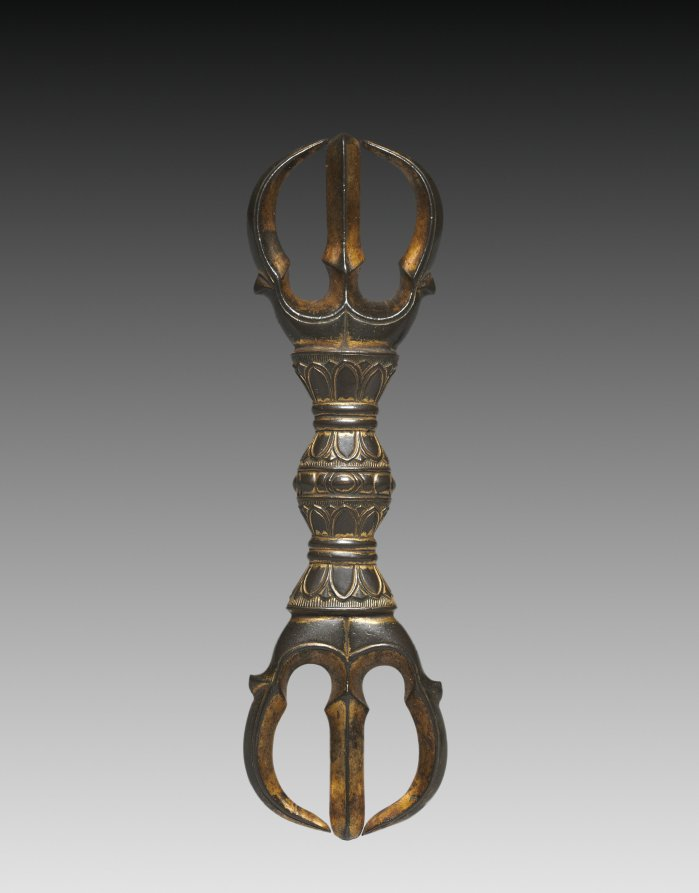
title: Three-pronged Vajra Pestle (Sankosho)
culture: Japan, Kamakura period (1185–1333)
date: early 1300s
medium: gilt bronze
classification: Metalwork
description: Called a vajra in Sanskrit, a pestle of this kind is an Esoteric Buddhist ritual implement derived from the thunderbolt held by the Indian Vedic god Indra. The round forms along the center of the handle, known as demon eyes, are rather compressed in this example, and the lotus petal shapes near the prongs are quite sharply delineated.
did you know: The vajra is said to tear through ignorance like a powerful thunderbolt.